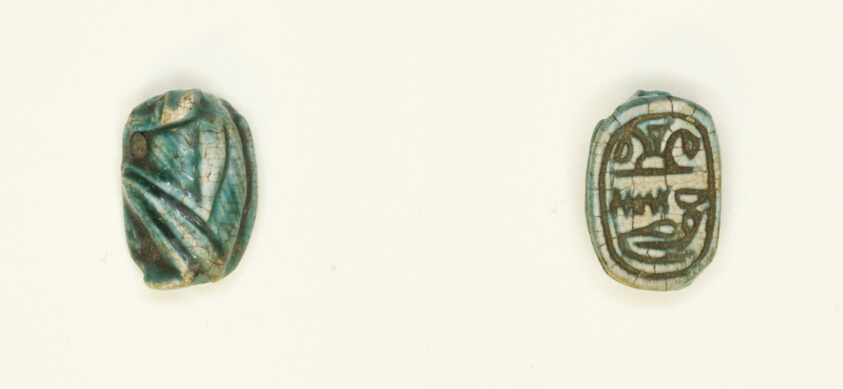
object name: Costume and Accessories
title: Scaraboid: Monkey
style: new kingdom, egyptian, ancient, second intermediate period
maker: Egyptian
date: Second Intermediate Period–Early New Kingdom, Dynasties 15–18 (about 1650–1295 BCE)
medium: Glazed steatite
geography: Egypt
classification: scaraboids; amulet; ancient art; costume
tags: baboon, floral motifs, Hieroglyphs, monkeys